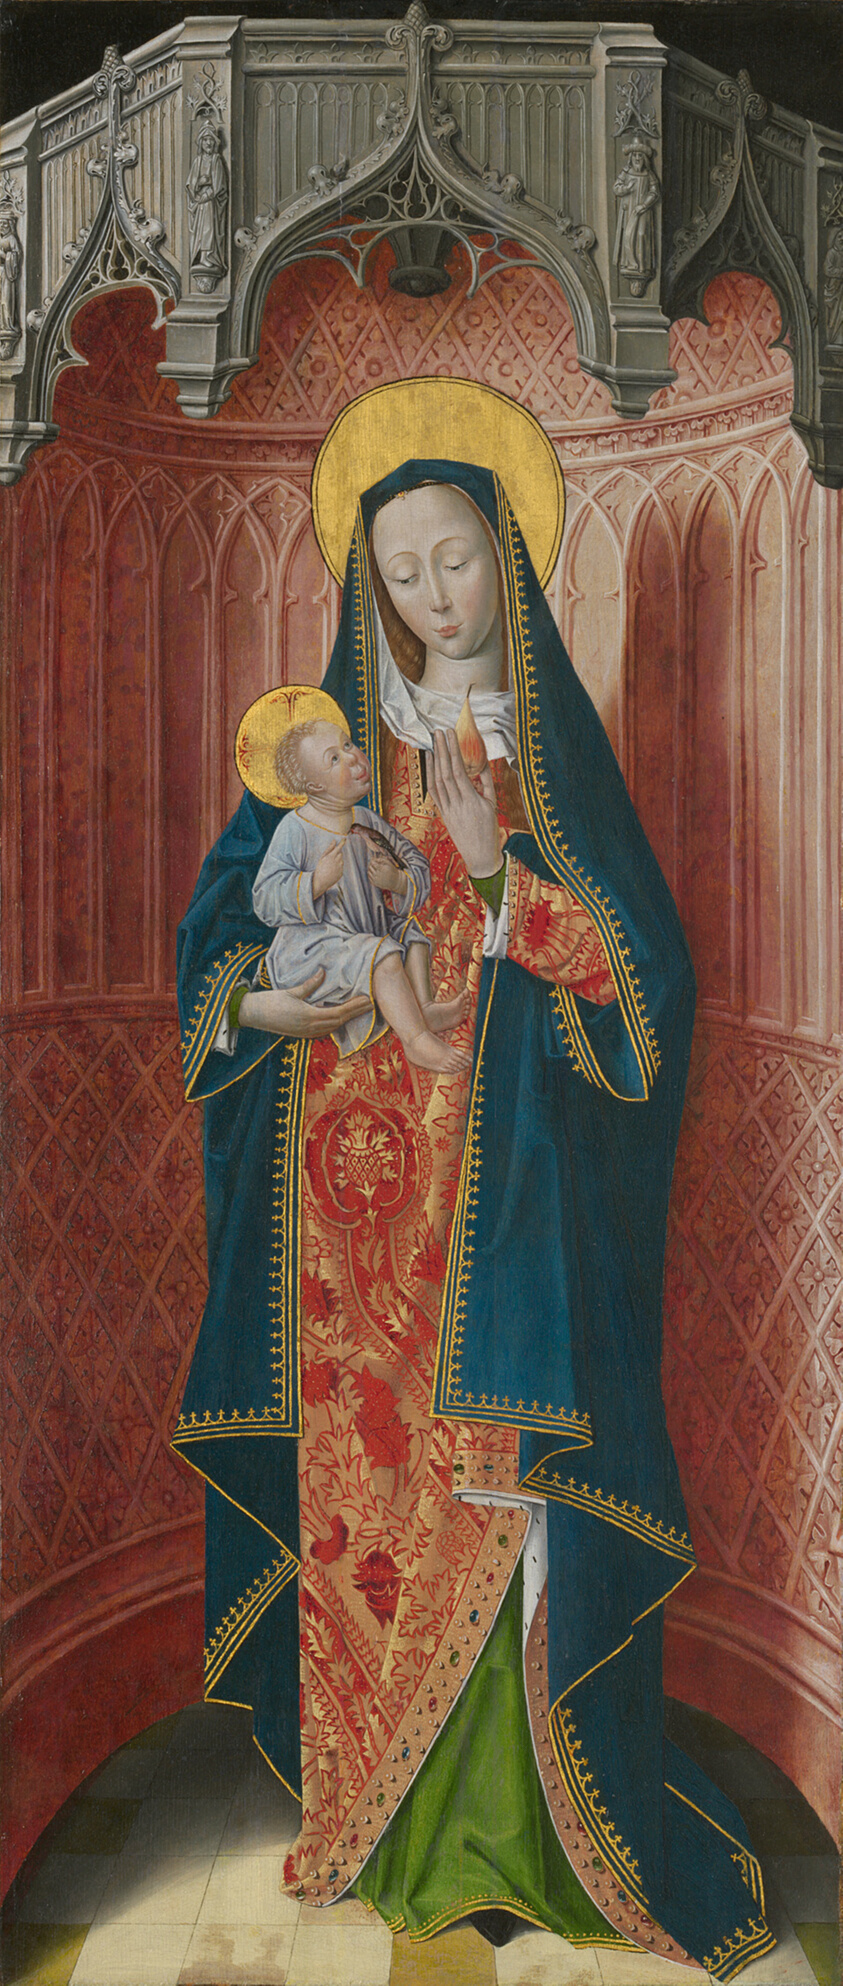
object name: Painting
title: Panels from the High Altar of the Charterhouse of Saint-Honoré, Thuison-les-Abbeville: Virgin and Child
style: 15th century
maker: French; Picardy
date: c. 1495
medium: Oil on panel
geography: France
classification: oil on panel; france; french; oil paintings (visual works); paint; painting; european painting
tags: Virgin and child/Madonna and child, altar, blue (color), Christian subjects, Christianity, France, Jesus, panel, religion, religious, religious figures, Virgin Mary, Century of Progress, world's fairs, Chicago World's Fairs